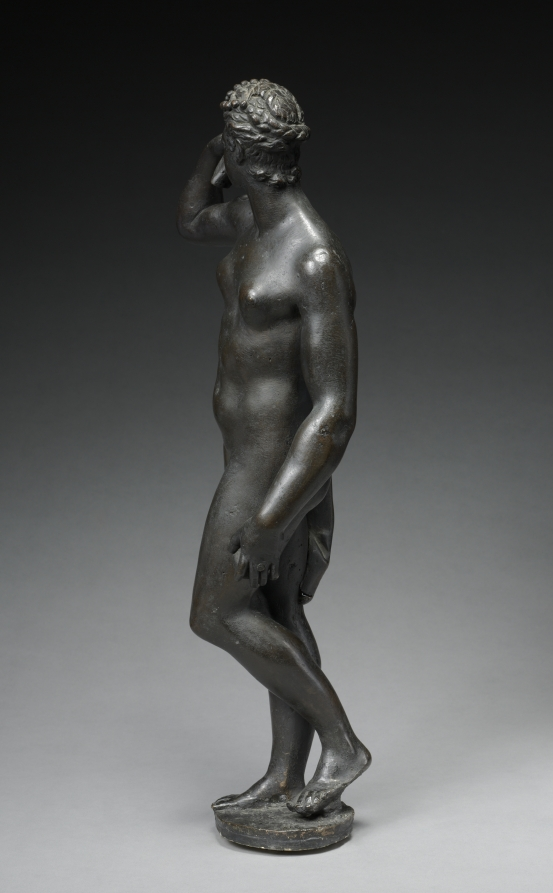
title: Venus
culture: Italy, 16th century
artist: Danese Cattaneo (Italian, 1509–1573)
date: c. 1560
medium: bronze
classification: Sculpture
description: Cattaneo's Venus is reminiscent of the ancient Aphrodite of Knidos by Praxiteles (Greek, c. 375–340 BC), as Venus holds her drapery in her right hand, leaving her body fully exposed. This work recalls Cattaneo's bronze sculptures of goddesses with the unbalanced curvature of the body and elaborately sculpted hair. Along with the hands and feet, the back of the figure is largely unfinished, indicating that it probably originally stood against a wall or in a niche.